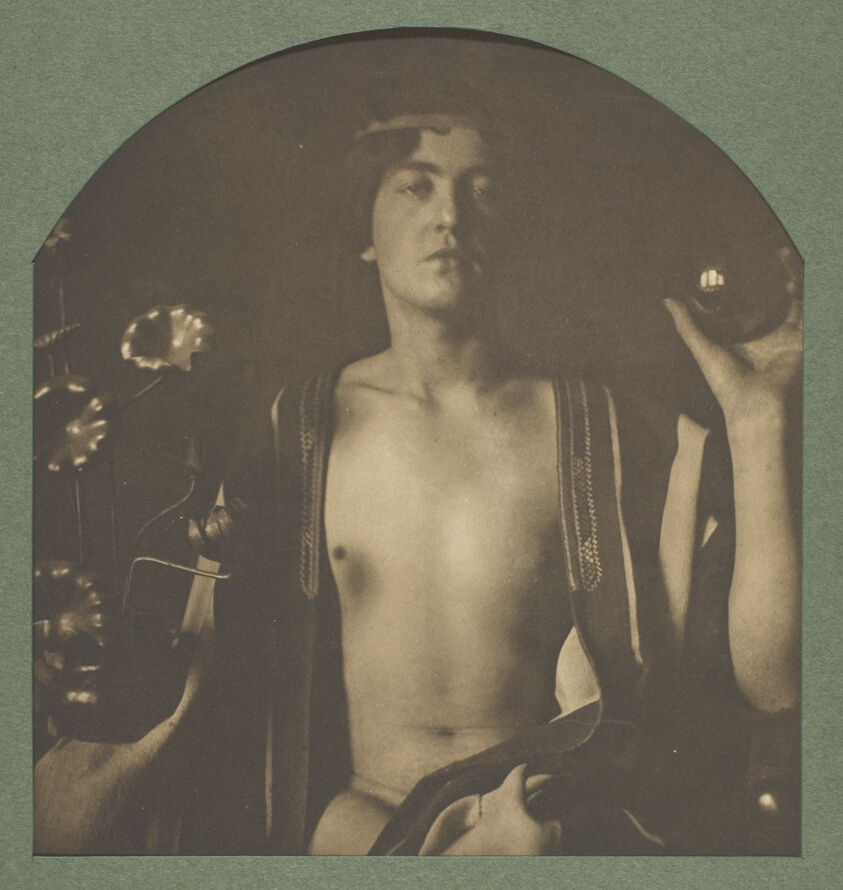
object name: Photograph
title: Beauty is Truth, Truth Beauty, No. 1 from the portfolio "American Pictorial Photography, Series I" (1899); edition 146/150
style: Pictorialism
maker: F. Holland Day (American, 1864-1933)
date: 1896/97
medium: Photogravure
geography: United States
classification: photogravure; photomechanical process; photography; photograph